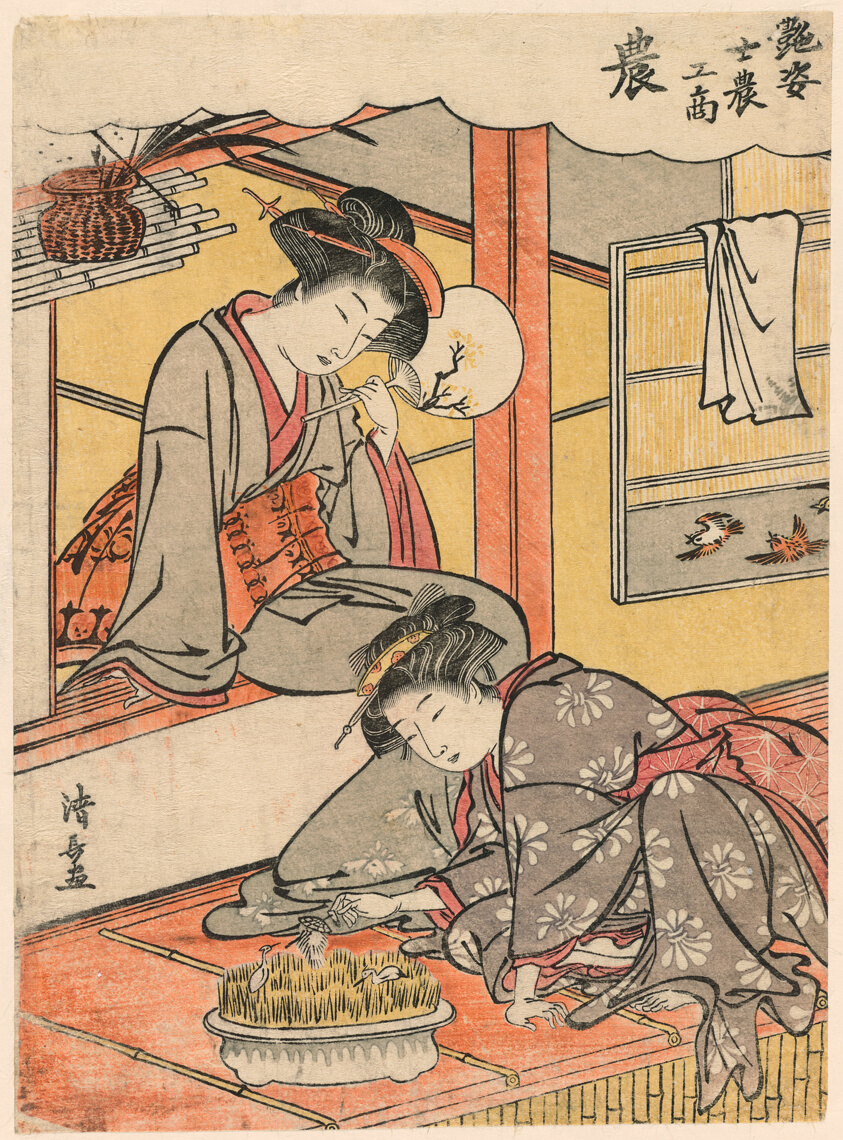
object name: Print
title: The Farmer (No) from the series Beauties Illustrating the Four Social Classes (Adesugata shi no ko sho)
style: Japanese (culture or style)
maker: Torii Kiyonaga (Japanese, 1752-1815)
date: c. 1779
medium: Color woodblock print; koban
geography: Japan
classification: woodblock print; print; asian art